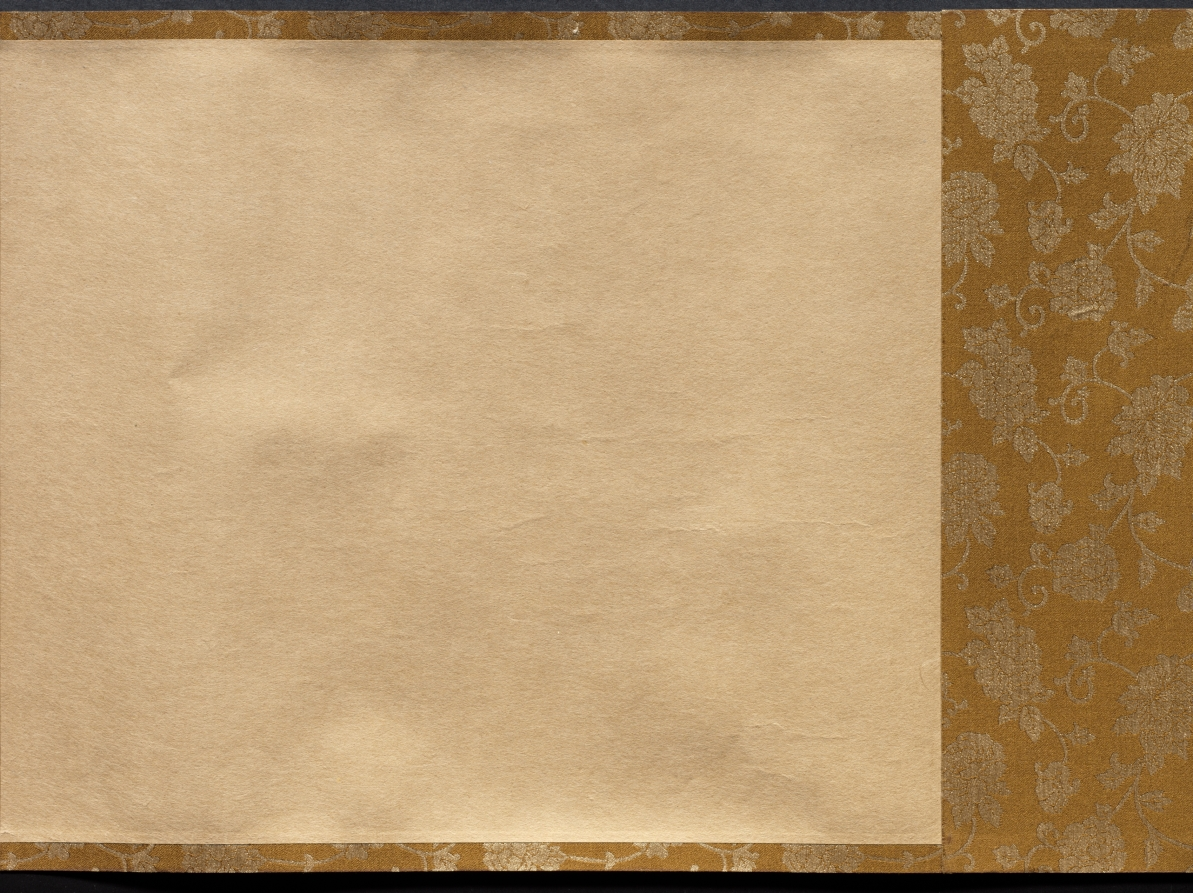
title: The Illustrated Tale of Oishi Hyōroku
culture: Japan, Edo period (1615–1868)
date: 1700s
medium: handscroll; ink and color on paper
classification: Painting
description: This incomplete handscroll illustrates part of the story of Oishi Hyoroku, a young man tasked with battling fox apparitions who were creating problems in his town. In other extant versions of the scroll, the story is set in the fall of 1624 in Kagoshima in southern Japan. Throughout the story, Hyoroku is tricked and terrified by the foxes that shift their shapes into a variety of monstrous phantoms. After repeated humiliations, he eventually captures two of the foxes. In this version, colloquial texts that function like text blurbs in comics appear throughout the scroll, but the main text is missing.